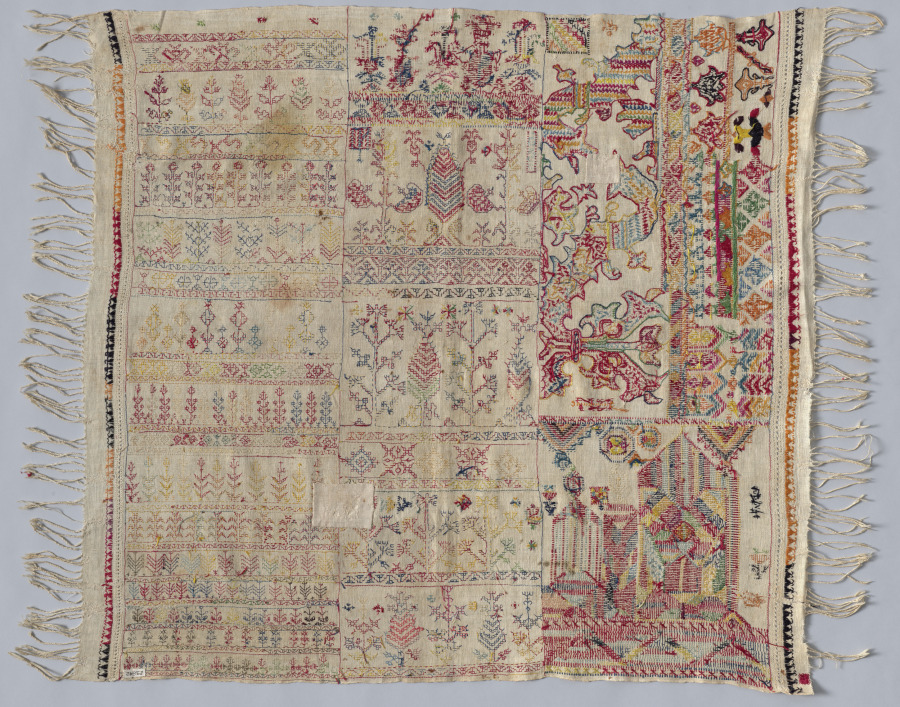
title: Embroidery sampler (chelliga/shelliga)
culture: Africa, North Africa, Morocco, Salé, Moroccan embroiderer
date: 1800s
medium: Cotton, silk, dye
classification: Sampler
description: These detailed samplers demonstrate the artist's technical range. Here, floral designs, protective open-palm hand motifs (khamsa) and various patterns are embroidered using double-running stitches, straight stitches, and long-armed cross stitches with dyed silk thread. Young women from all social classes would learn these skills from a master craftswoman (mu’allima), who taught within her home. Upon the completion their studies, these professionally trained women would produce a sampler as a “diploma” testifying to their skills.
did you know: This sampler's motifs include human figures, floral motifs, doorways, and “resha” starlike motifs. It is unusual for samplers to have a fringe border.